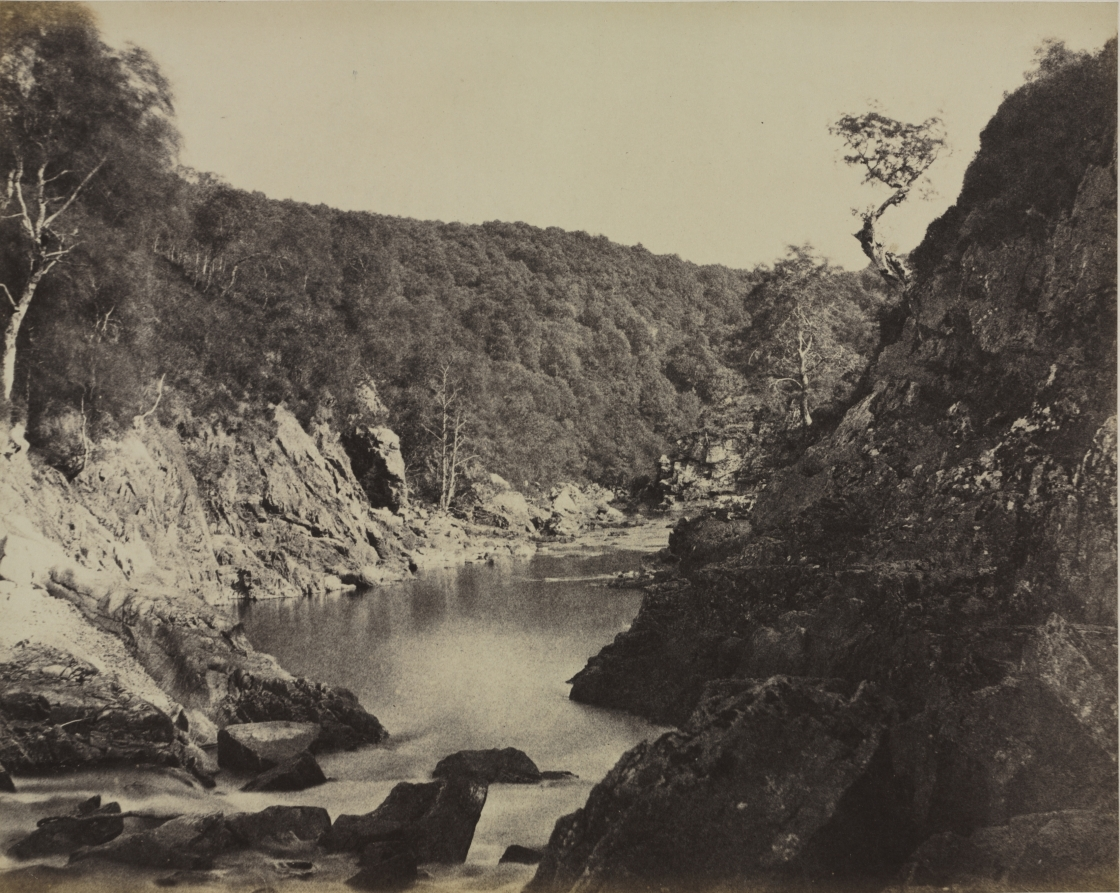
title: River Landscape, Scotland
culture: England, 19th century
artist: Captain Horatio Ross (British, 1801–1886)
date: c. 1858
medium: albumen print from wax paper negative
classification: Photograph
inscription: Written in pencil on recto of mount: "91"; [Erasures]; "CAT #41"; "A1006"; "95"